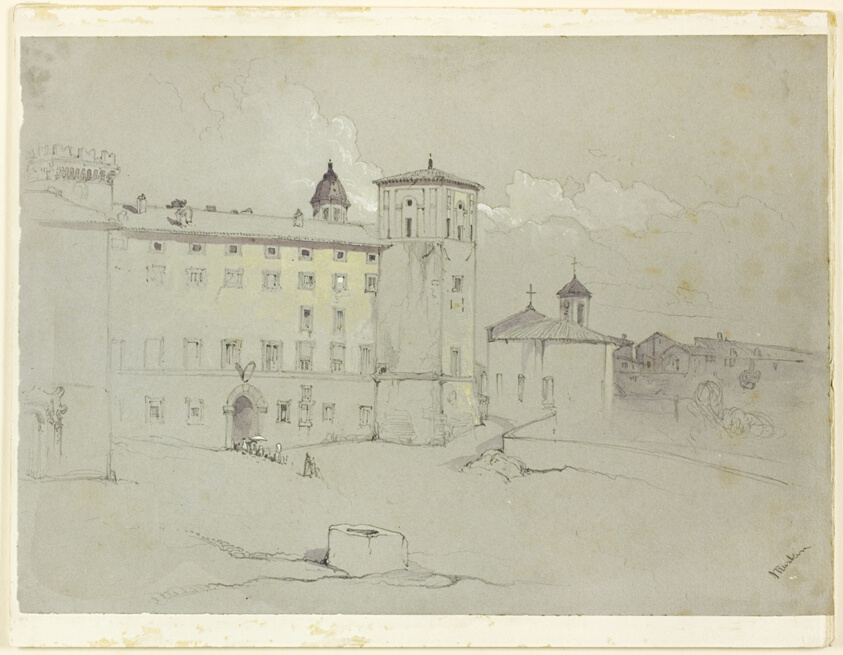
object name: Drawing and Watercolor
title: Viterbo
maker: John Ruskin (English, 1819-1900)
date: c. 1840–49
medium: Graphite, with brush and watercolor and gouache, on gray wove paper, laid down on board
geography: England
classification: graphite; drawings (visual works); prints and drawing